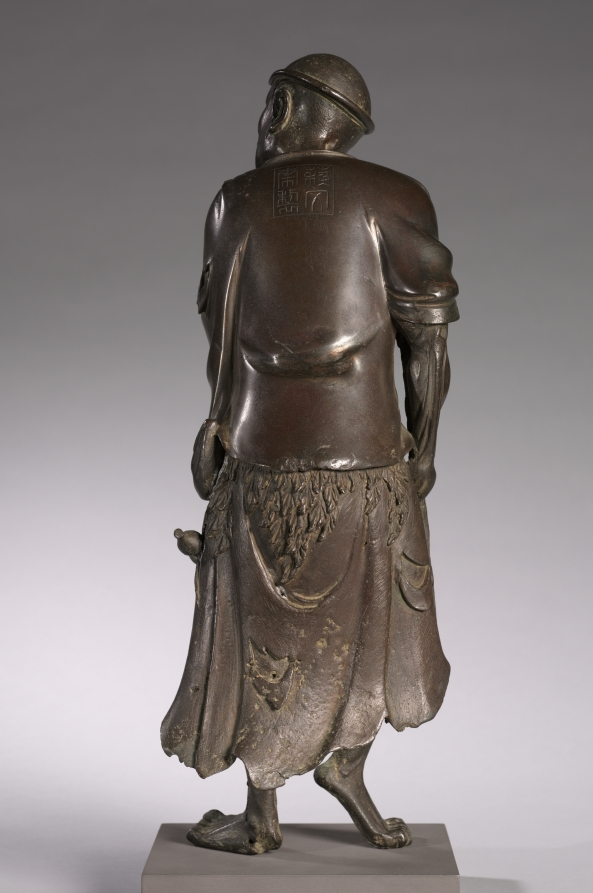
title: The Immortal Li Tieguai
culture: China, Ming dynasty (1368–1644)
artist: Su Wennan (Chinese)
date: 1500s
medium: bronze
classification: Sculpture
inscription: 蘇文南製 (Su Wennan Zhi )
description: This bronze statue of Li Tieguai shows him dressed as a beggar in a tattered robe, holding a crutch in his right and a ball of medicine in his left hand. Li Tieguai is the patron saint for physicians and legend says that he dispenses pills from the gourd for the sick. He wears a belt of leaves and another gourd hangs from his waist. His head is crowned with what appears to be a metal ring, signifying his immortal status. Four incised characters in seal script on the back of the figure reads “made by Su Wennan (蘇文南製).”